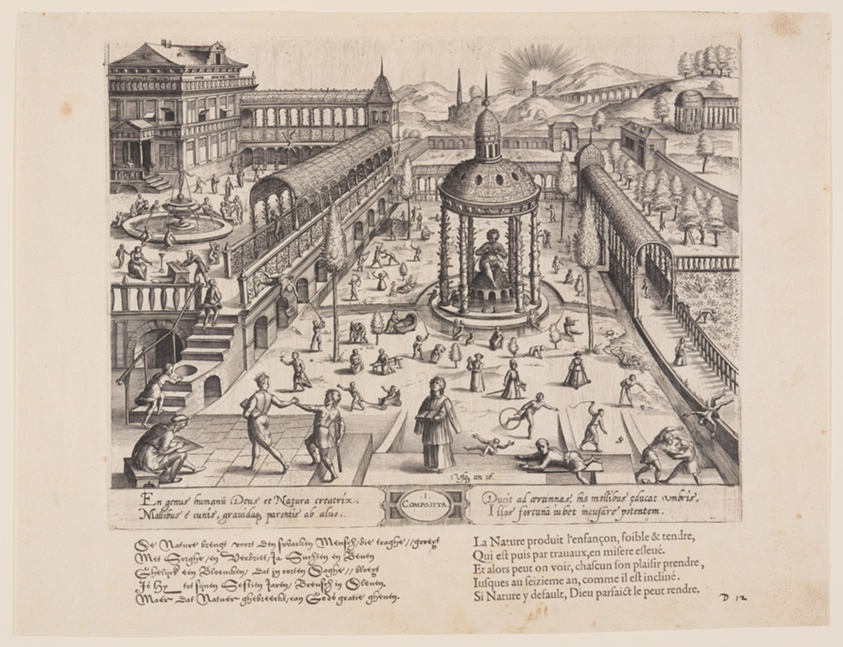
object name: Print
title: Composita,from Theatrum Vitae Humanae (The Ages of Man)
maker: Jan Wierix (Flemish, 1549–c. 1618)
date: 1577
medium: Engraving on ivory laid paper, with letterpress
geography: Flanders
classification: engraving; paper; print; prints and drawing